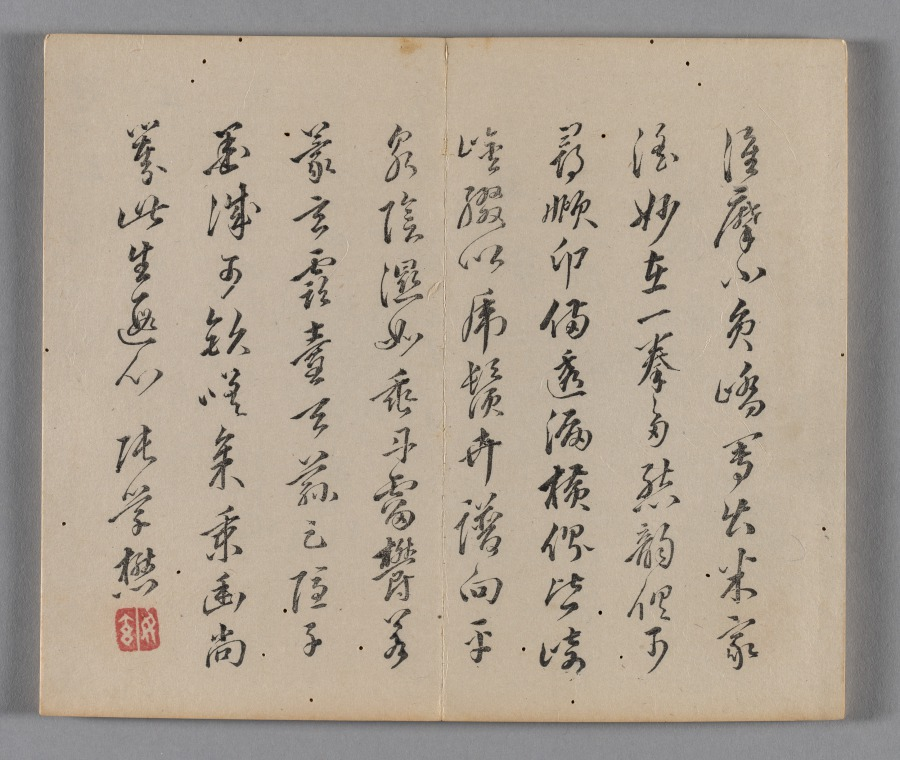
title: Ten Bamboo Studio Collection of Calligraphy and Painting: Miscellaneous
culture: China, Qing dynasty (1644-1911)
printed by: Hu Zhengyan (Chinese, c. 1584–1674)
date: 1633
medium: Woodblock-printed book; ink and colors on paper; first edition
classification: Print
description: Color printing reached a level of perfection in the early 1600s, as seen in this Ten Bamboo Studio Collection of Calligraphy and Painting and the Mustard Seed Garden Manual of Painting (printed 1679 and 1701). The painterly quality, precision in registering (aligning) the woodblocks, and harmonious colors made them the most successful color print editions in Chinese history. Both editions were printed and compiled in Nanjing, spread nationwide, and had a great impact on the arts in Japan and Korea.